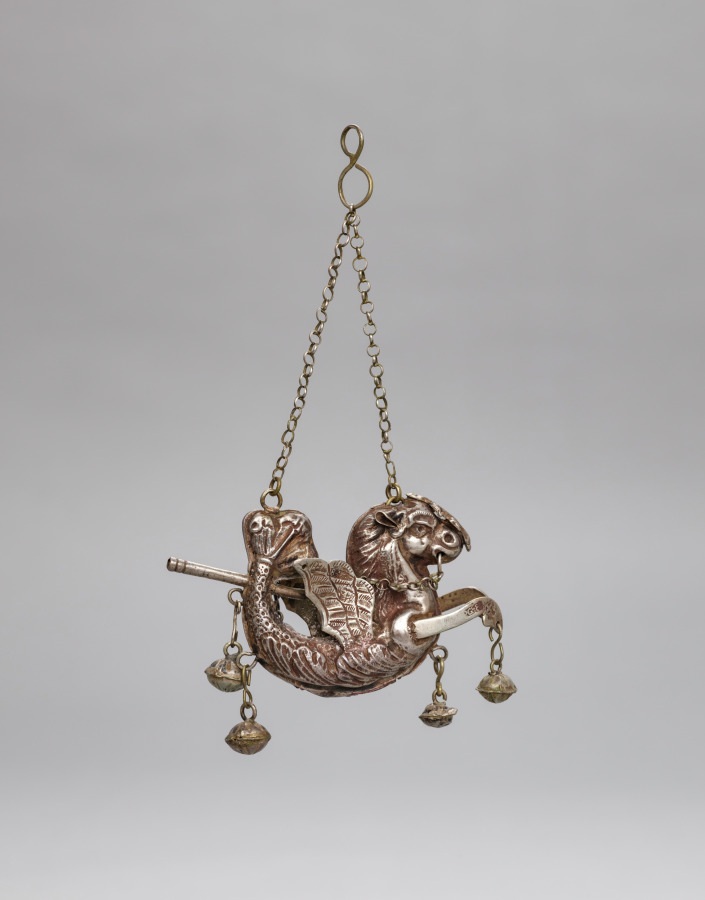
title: Rattle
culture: Italy, Sicily, 18th century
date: 1700s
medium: silver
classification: Silver